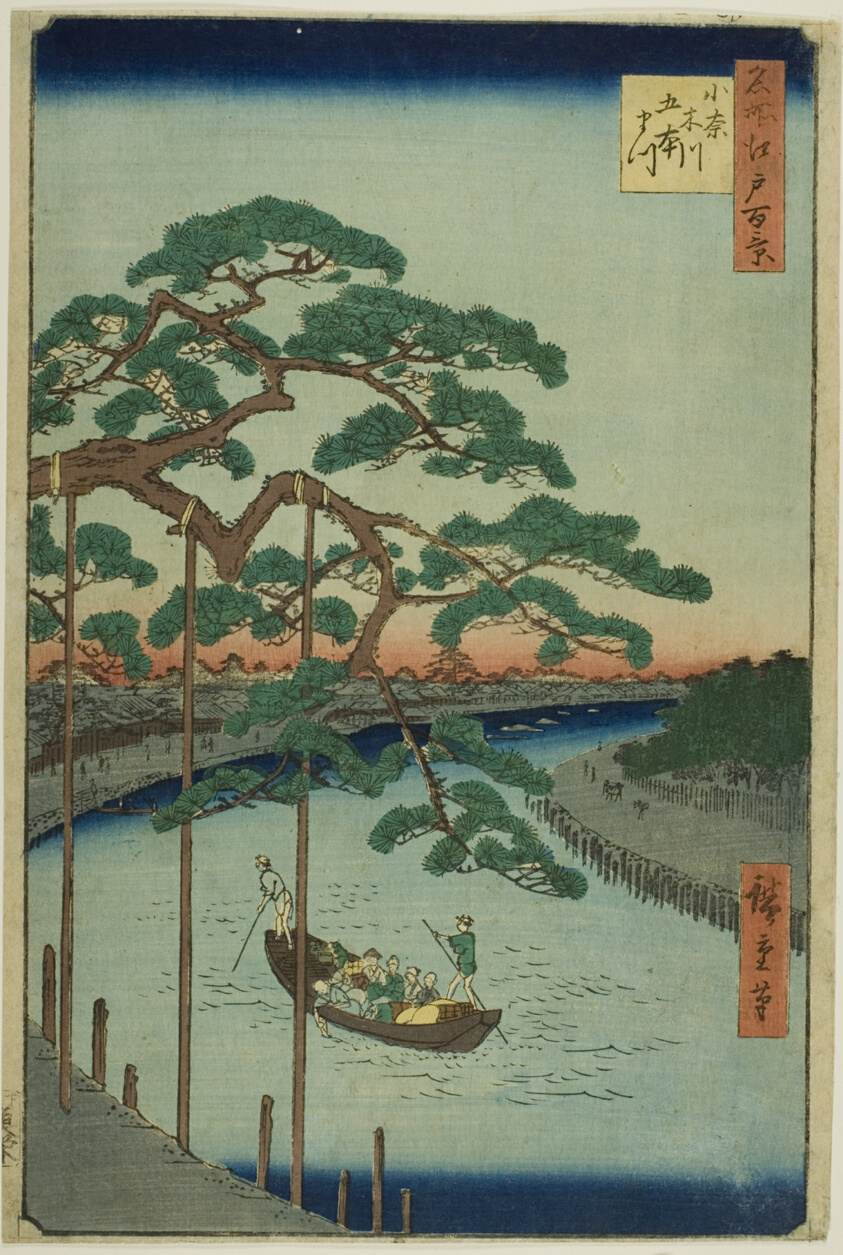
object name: Print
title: The Five Pines on the Onagi River (Onagigawa Gohonmatsu), from the series "One Hundred Famous Views of Edo (Meisho Edo hyakkei)"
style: Japanese (culture or style)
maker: Utagawa Hiroshige 歌川 広重; Japanese, 1797–1858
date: 1856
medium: Color woodblock print; oban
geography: Japan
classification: woodblock print; print